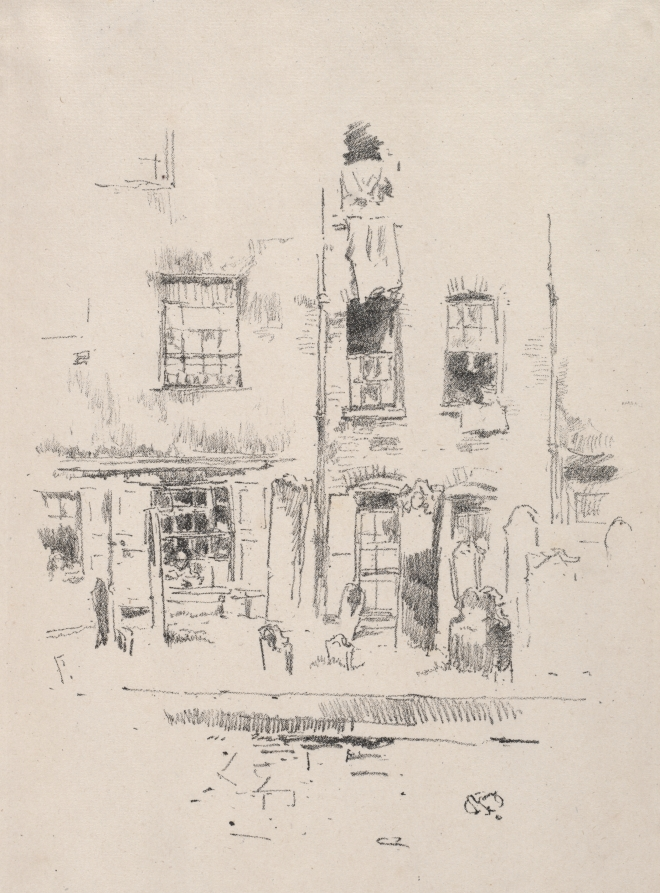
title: Churchyard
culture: America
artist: James McNeill Whistler (American, 1834–1903)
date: 1887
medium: lithograph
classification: Print